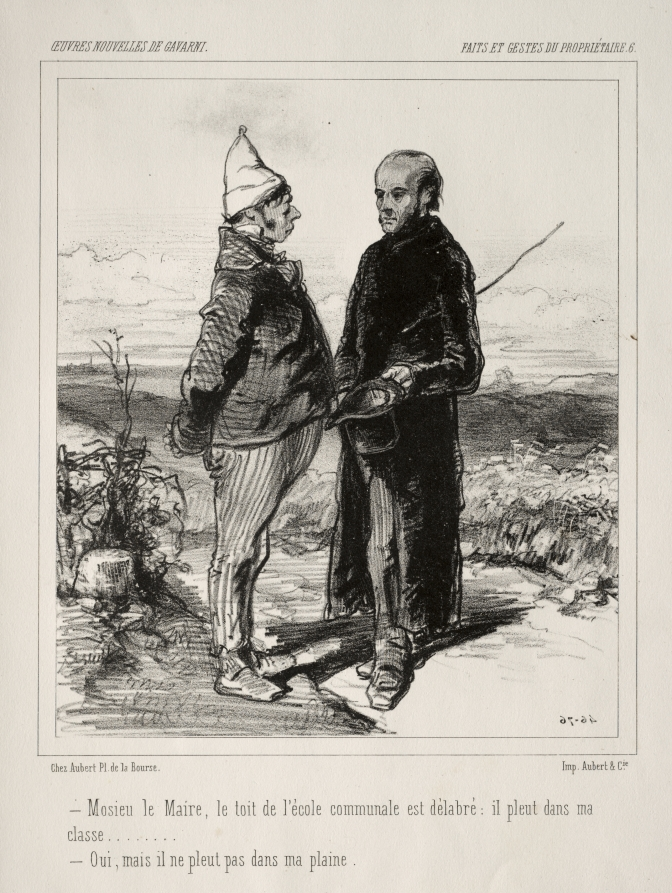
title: Les Martyrs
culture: France, 19th century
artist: Paul Gavarni (French, 1804–1866)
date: c. 1847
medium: lithograph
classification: Print